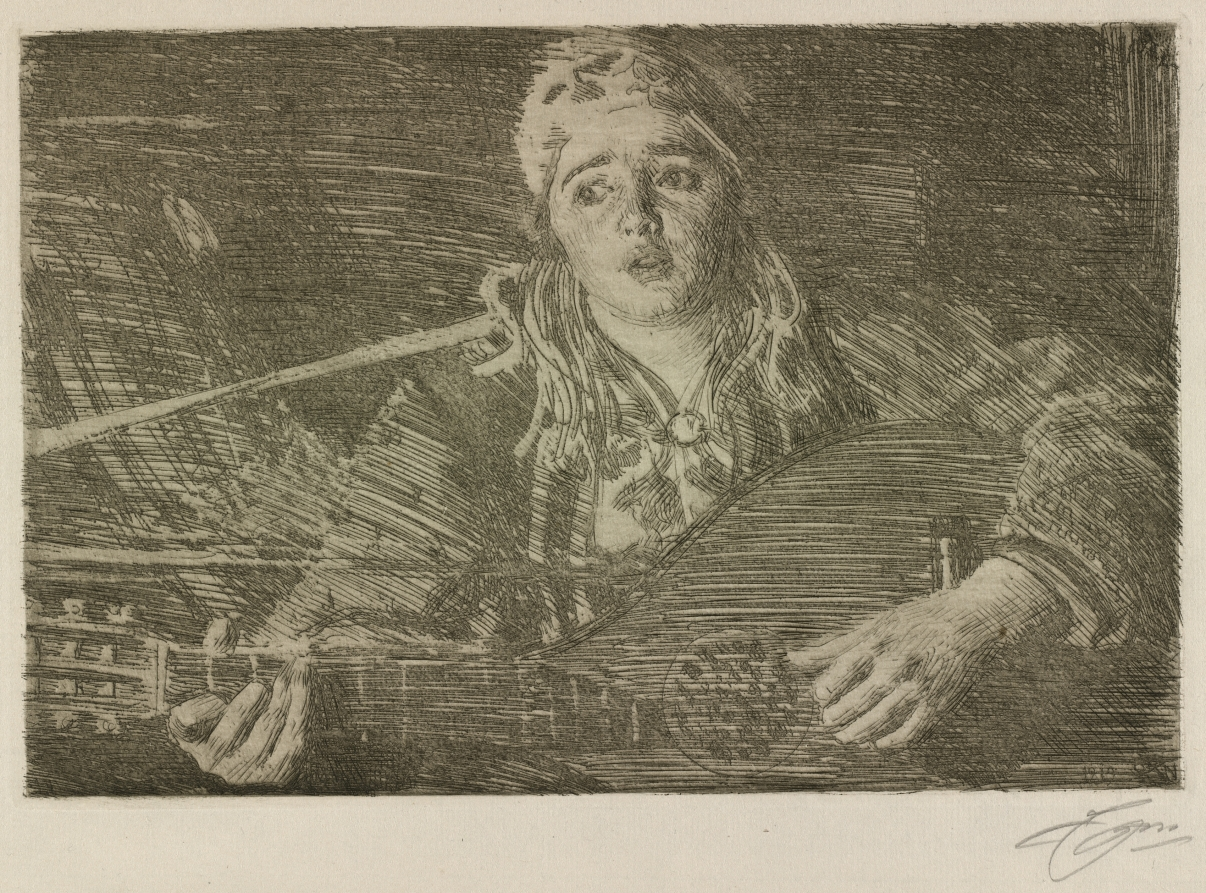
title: Ols Maria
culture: Sweden, 20th century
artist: Anders Zorn (Swedish, 1860–1920)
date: 1919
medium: etching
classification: Print